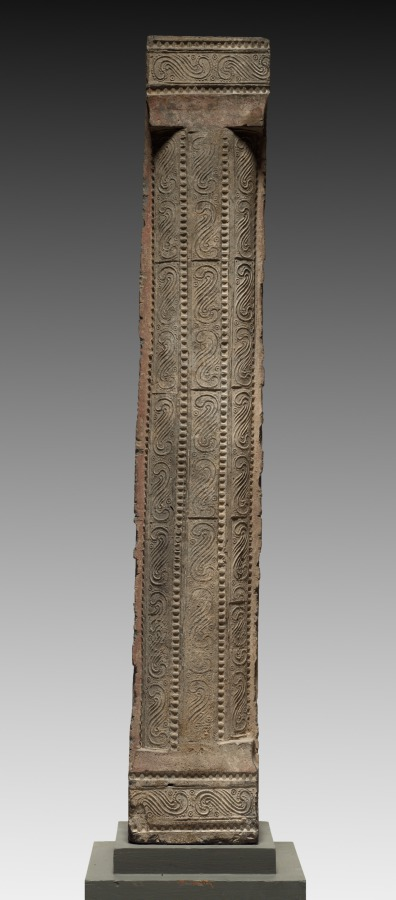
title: Hollow Tile: Column from Tomb-Chamber Doorway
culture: China, Han dynasty (202 BCE–220 CE)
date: 100–200 CE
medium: earthenware, die-stamped relief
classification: Ceramic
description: Striding tigers (top), racing horsemen (right column), and reverent officials (left column) are stamped into the surface of this underground portal to a tomb. The doorway preserves in stone the post-and-lintel structure, a basic element of Chinese wooden architecture. By the first century AD, a revolution in Chinese tomb construction and furnishing had taken place. Tombs lined with decorated bricks and tiles replace the earlier tombs constructed with only rammed earth-walls. Ceramic surrogates or models of stoves, houses, servants, and pets filled these more durable chambers, symbolically extending the creature comforts of this world into the world after death.